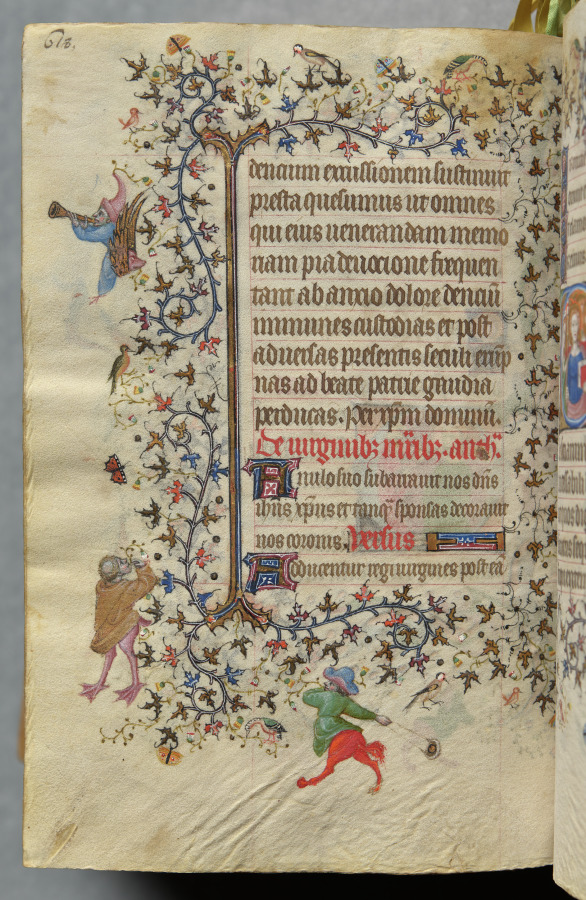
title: Hours of Charles the Noble, King of Navarre (1361-1425): fol. 303vr, Text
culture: France, Paris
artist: Master of the Brussels Initials and Associates (French)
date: c. 1405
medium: ink, tempera, and gold on vellum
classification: Bound Volume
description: This precious volume was obviously highly prized by its owner, the French-born King of Navarre, who had his coat of arms painted on no less than twenty folios. Rather than directly commissioning this manuscript from a specific workshop, it seems that Charles the Noble acquired his book of hours -- perhaps ready-made for the luxury market -- while on a trip to Paris in 1404-05. A collaborative effort, six painting styles are evidenced within the pages of this codex, those of two Italians, two Frenchmen, and two Netherlanders. The painter who was responsible for the planning and decoration of the book, and who produced seventeen of the large miniatures, was a Bolognese artist known as the Master of the Brussels Initials. His principal assistant, responsible for most of the borders, was a Florentine who signed his name "Zecho" da Firenze on folio 208 verso.